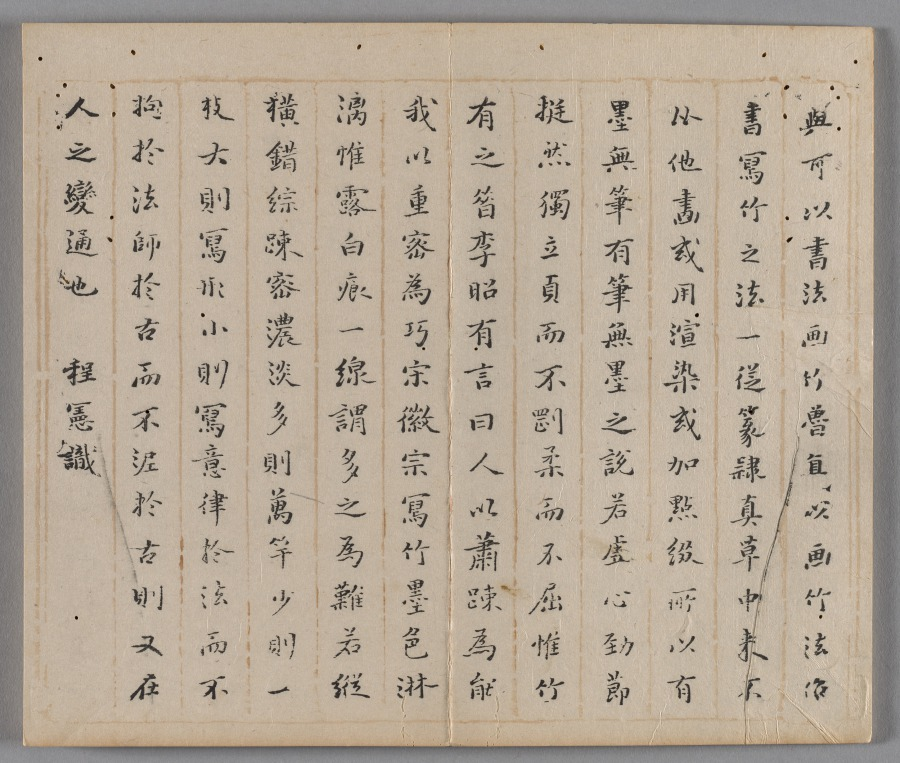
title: Ten Bamboo Studio Painting and Calligraphy Handbook (Shizhuzhai shuhua pu): Bamboo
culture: China, Qing dynasty (1644-1911)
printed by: Hu Zhengyan (Chinese, c. 1584–1674)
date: 1633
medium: Woodblock-printed book; ink and colors on paper; first edition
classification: Print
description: Color printing reached a level of perfection in the early 1600s, as seen in this Ten Bamboo Studio Collection of Calligraphy and Painting and the Mustard Seed Garden Manual of Painting (printed 1679 and 1701). The painterly quality, precision in registering (aligning) the woodblocks, and harmonious colors made them the most successful color print editions in Chinese history. Both editions were printed and compiled in Nanjing, spread nationwide, and had a great impact on the arts in Japan and Korea.